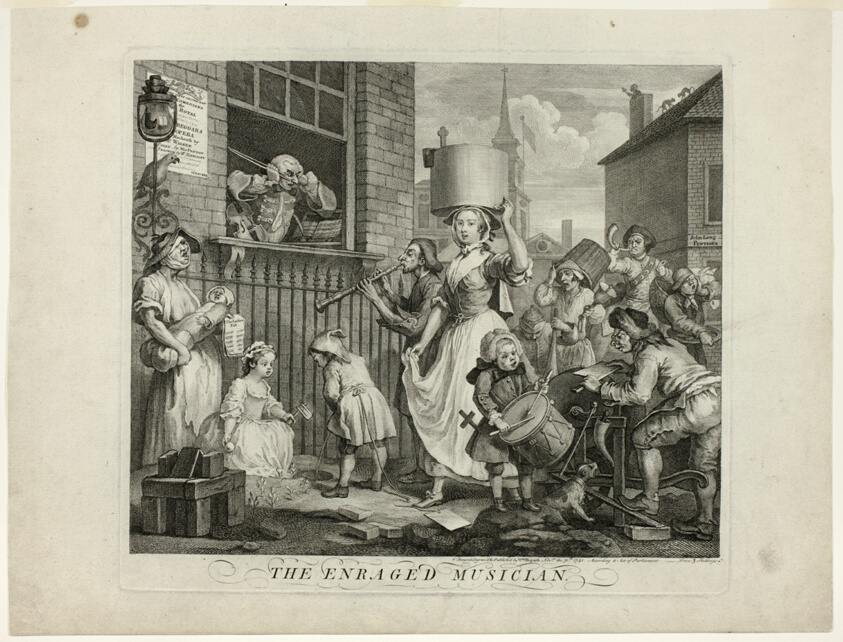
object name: Print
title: The Enraged Musician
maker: William Hogarth (English, 1697-1764)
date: November 1741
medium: Engraving in black on ivory laid paper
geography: England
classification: engraving; print; prints and drawing